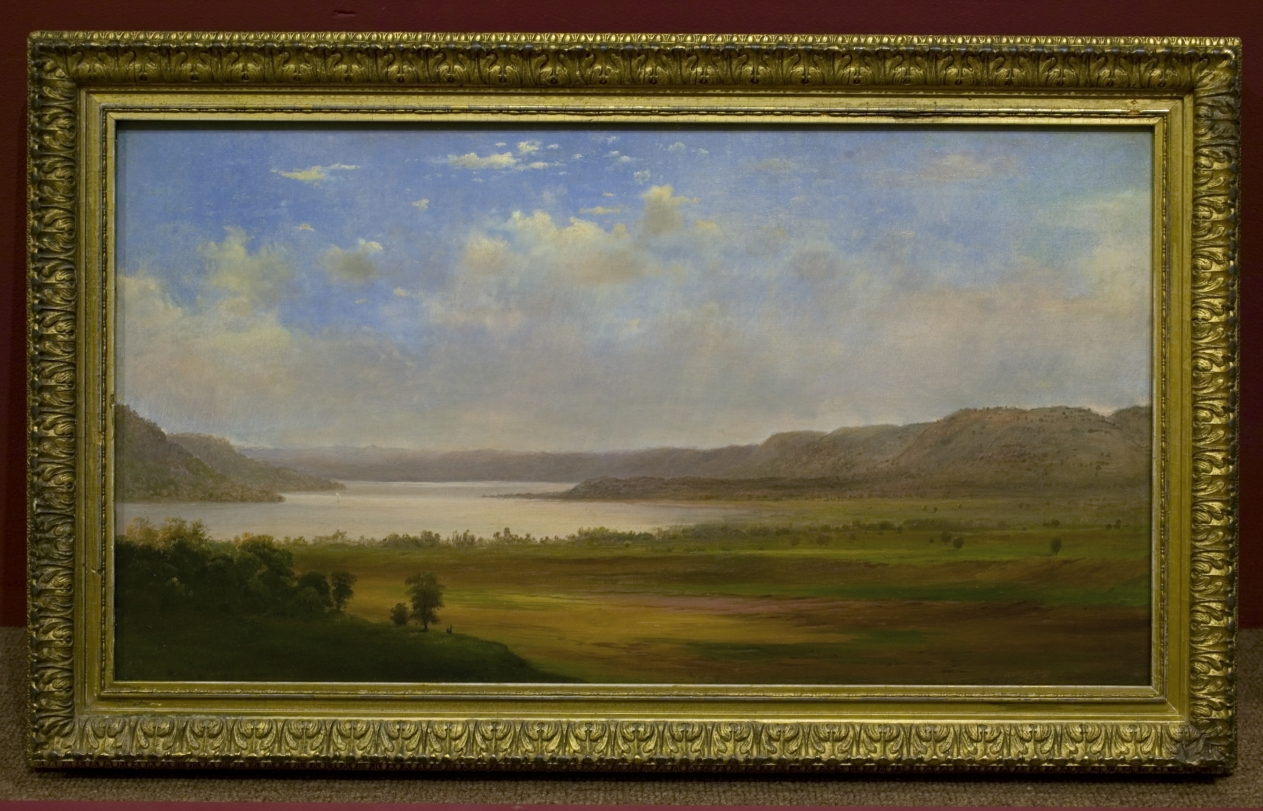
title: View of Lake Pepin, Minnesota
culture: America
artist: Robert S. Duncanson (American, 1821–1872)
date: 1862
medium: oil on canvas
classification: Painting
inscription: Signed lower left: R.S.D. / 1862; signed on verso: Valley of Lake Pepin/Minnesota/Painted By R.S.D.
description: Duncanson was the first African American painter to achieve recognition at home and abroad. Although most of his career was spent in Cincinnati, he painted this calm, panoramic scene during a journey up the Mississippi River to Canada, which he likely made to escape the upheaval of the Civil War. Duncanson worked in Montreal and London, England, before returning home after the war.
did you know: The sport of waterskiing was invented on Lake Pepin in 1922.